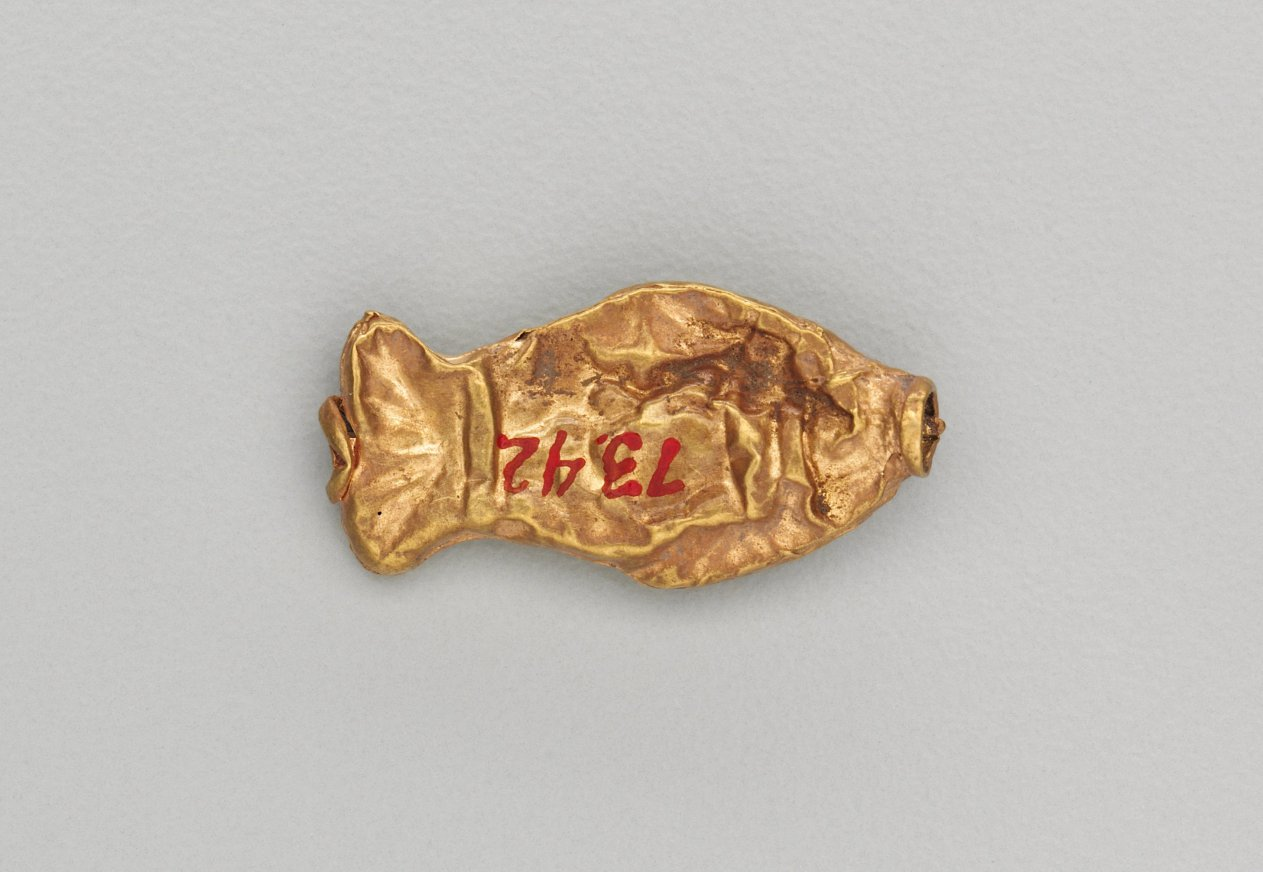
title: Necklace Bead in the Form of a Fish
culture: India, Shunga period (185–78 BCE)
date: 185–72 BCE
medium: gold repoussé with granulation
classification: Jewelry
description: Jewelry in ancient India often consisted of elements associated with water, such as fish and other aquatic plants and animals. Since water is essential for life, imagery that connotes water is life-affirming, or auspicious, and therefore appropriate adornment.